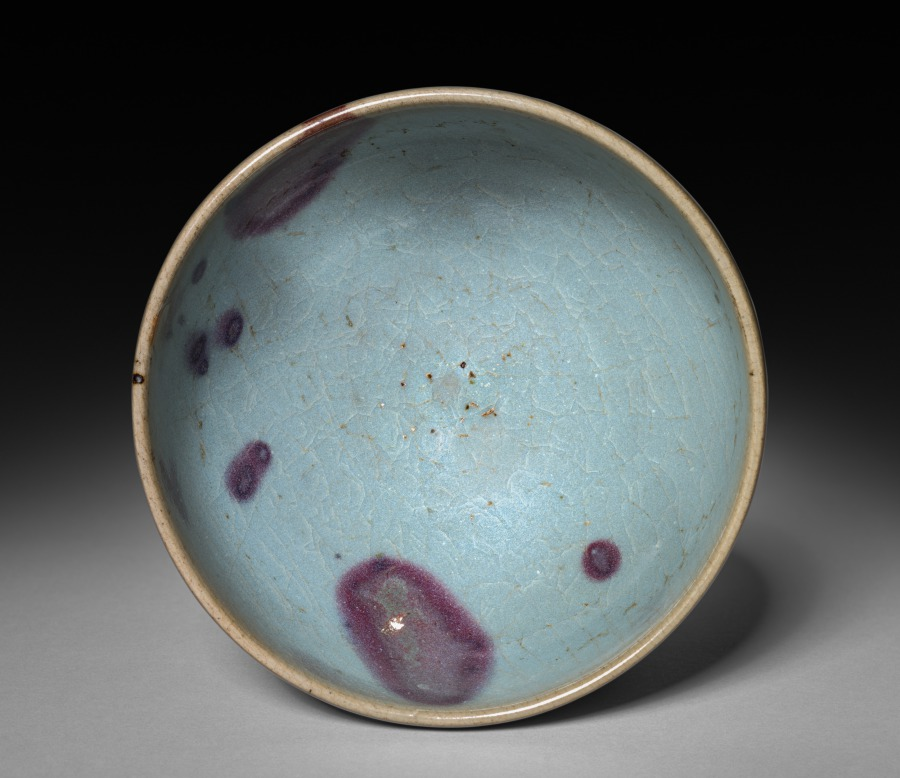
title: Bowl: Jun ware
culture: Northern China, Jin dynasty (1115-1234) - Yuan dynasty (1271-1368)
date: Jin dynasty (1115–1234) - Yuan dynasty (1271–1368)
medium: glazed buff stoneware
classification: Ceramic